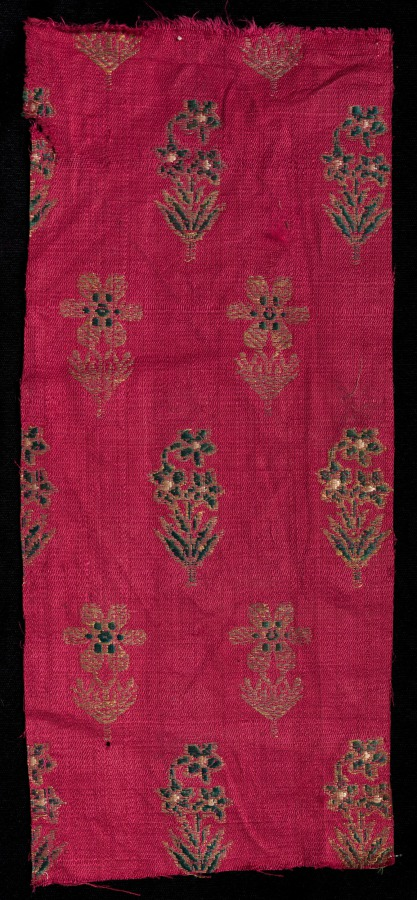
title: Fragment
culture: India, 19th century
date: 1800s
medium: brocade; silk and metal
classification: Textile